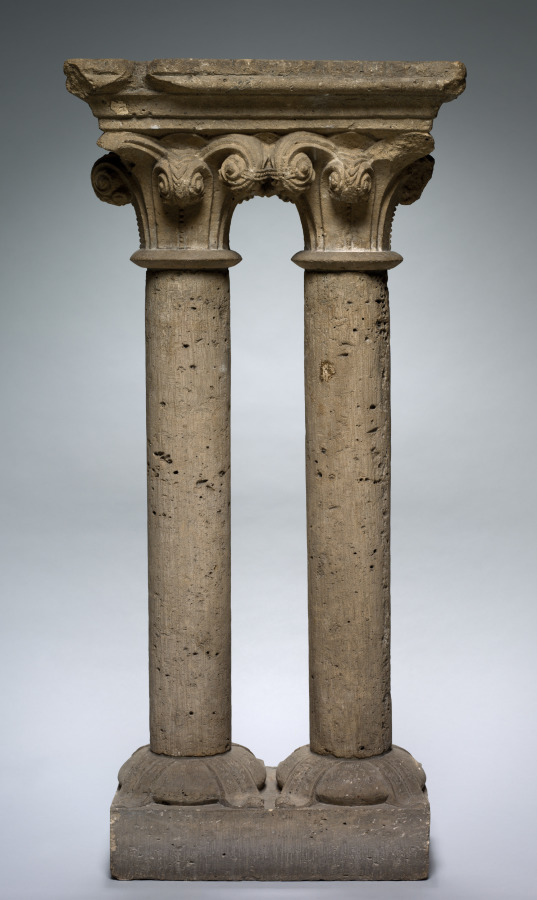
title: Capitals and Columns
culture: France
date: 1200s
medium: stone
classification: Sculpture